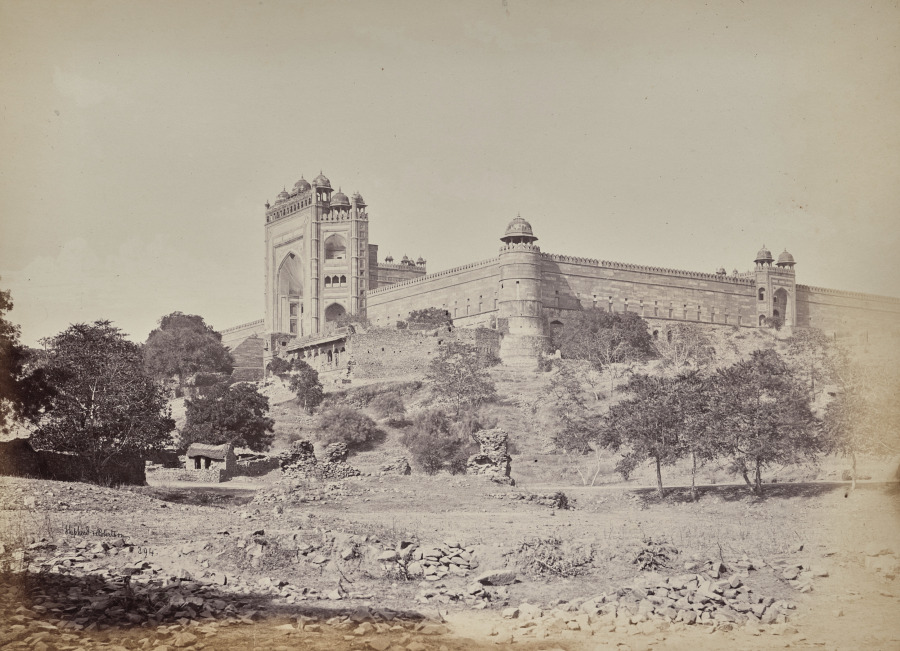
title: Fort of Futheypoor Sikre near Agra. The Residence of the Emperor Akbar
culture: England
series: Photographs of Northern India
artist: Samuel Bourne (British, 1834–1912)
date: 1863–70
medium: albumen print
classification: Photograph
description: The 50 images in this album, all taken in the 1860s, move from the hill towns of the Himalayas down to cities including Lahore (now in Pakistan), Delhi, Lucknow, Agra, Benares (now Varansi), and Calcutta (now Kolkata). Architectural studies of major monuments offer valuable historical records of what sites such as the Taj Mahal and the imperial mosque of the Mughal emperors in Delhi looked like before twentieth-century restorations.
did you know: Samuel Bourne, the author of most the images in this album, was a banker in England before he moved to India to become a professional photographer.